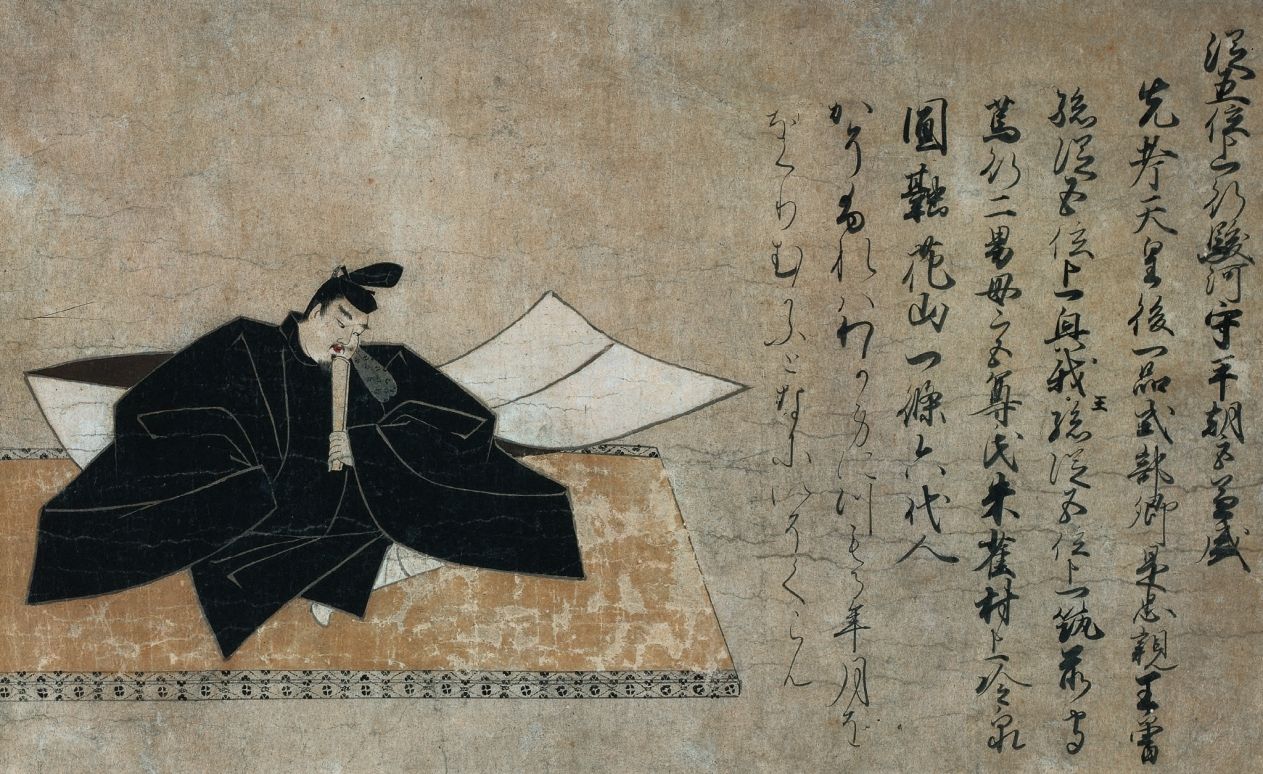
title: Taira no Kanemori of the Thirty-Six Poetic Immortals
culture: Japan, Kamakura period (1185–1333)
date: 1200s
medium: Section of a handscroll mounted as a hanging scroll; ink and color on paper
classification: Painting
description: Taira no Kanemori was one of the 36 poetic immortals of classical Japanese literature. This painting is a fragment of what was once a handscroll depicting all 36 poets.